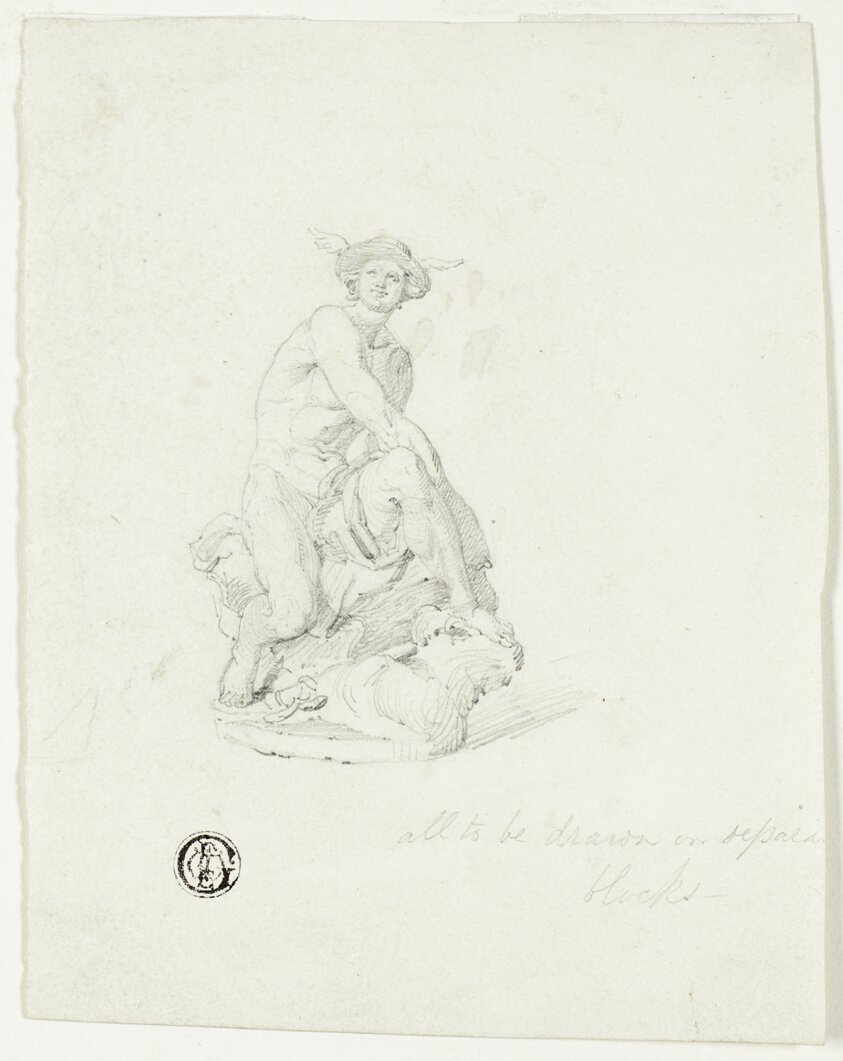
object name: Drawing and Watercolor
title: Mercury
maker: Unknown Artist; British, n.d.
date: c. 1845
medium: Graphite on ivory wove paper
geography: United Kingdom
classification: graphite; drawings (visual works); prints and drawing